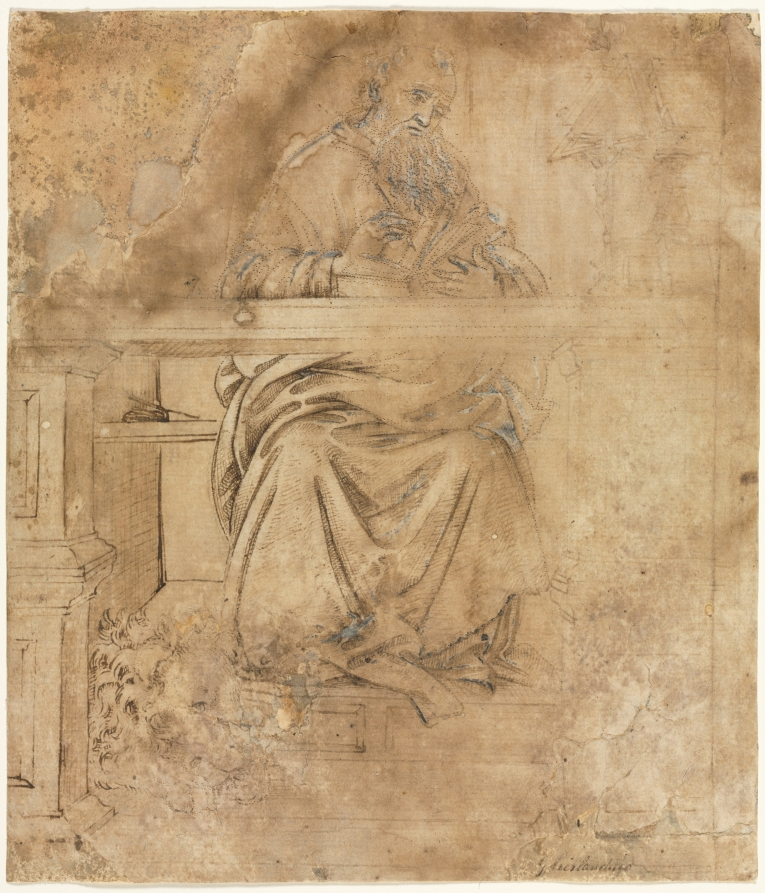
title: St. Jerome in His Study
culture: Italy, 15th century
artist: Filippino Lippi (Italian, c. 1457–1504)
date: c. 1490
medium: pen and brown ink over traces of black chalk(?), with brush and brown wash, heightened with lead white; pricked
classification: Drawing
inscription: lower right, in brown ink: Ghirlandaio ; VERSO, upper left, in brown ink: Domenico Ghirlandaio / Fiorentino ; upper left, in graphite: R. Johnson + 1877 ; lower center, in graphite: A 273